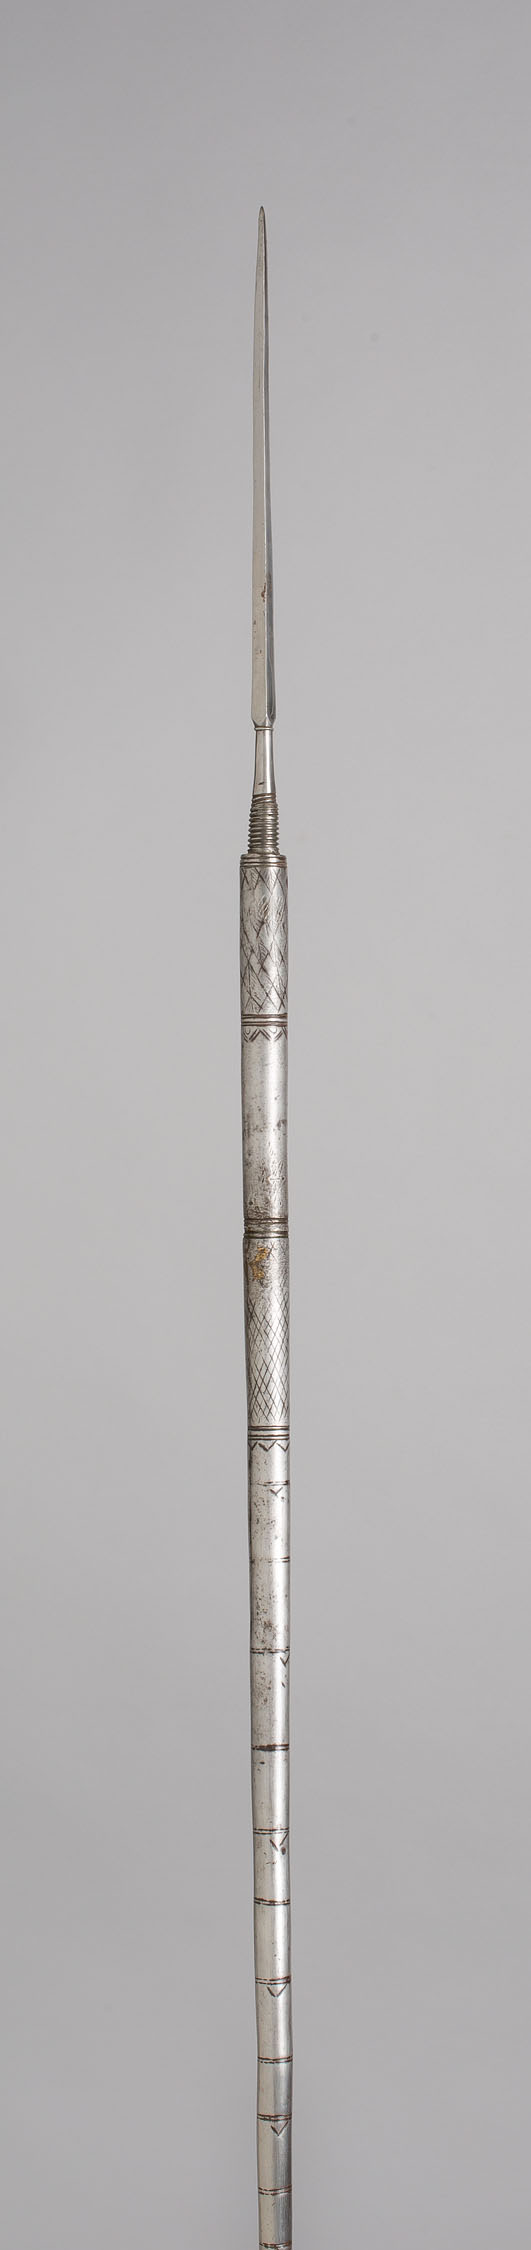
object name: Arms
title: Walking Staff- Javelin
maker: Spanish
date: 1590/1610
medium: Steel and thread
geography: Spain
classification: edged weapon-staff; arms; arms and armor